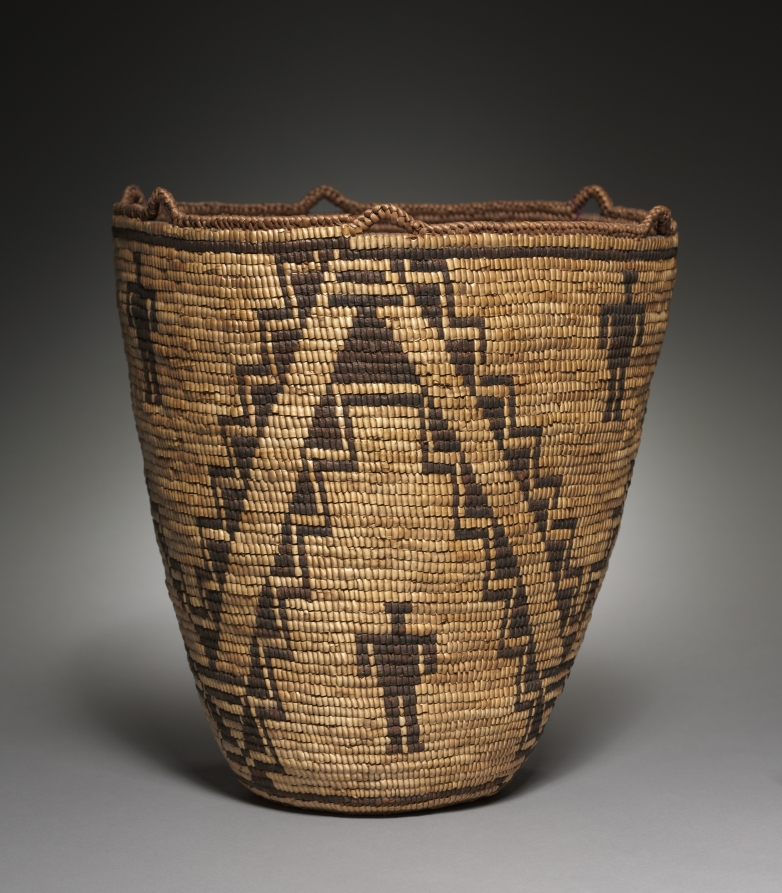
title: Burden Basket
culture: Native North American, Pacific Northwest, Plateau, Klickitat people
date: c.1900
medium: horsetail fragments on cedar rool; coiled, imbricated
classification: Basketry